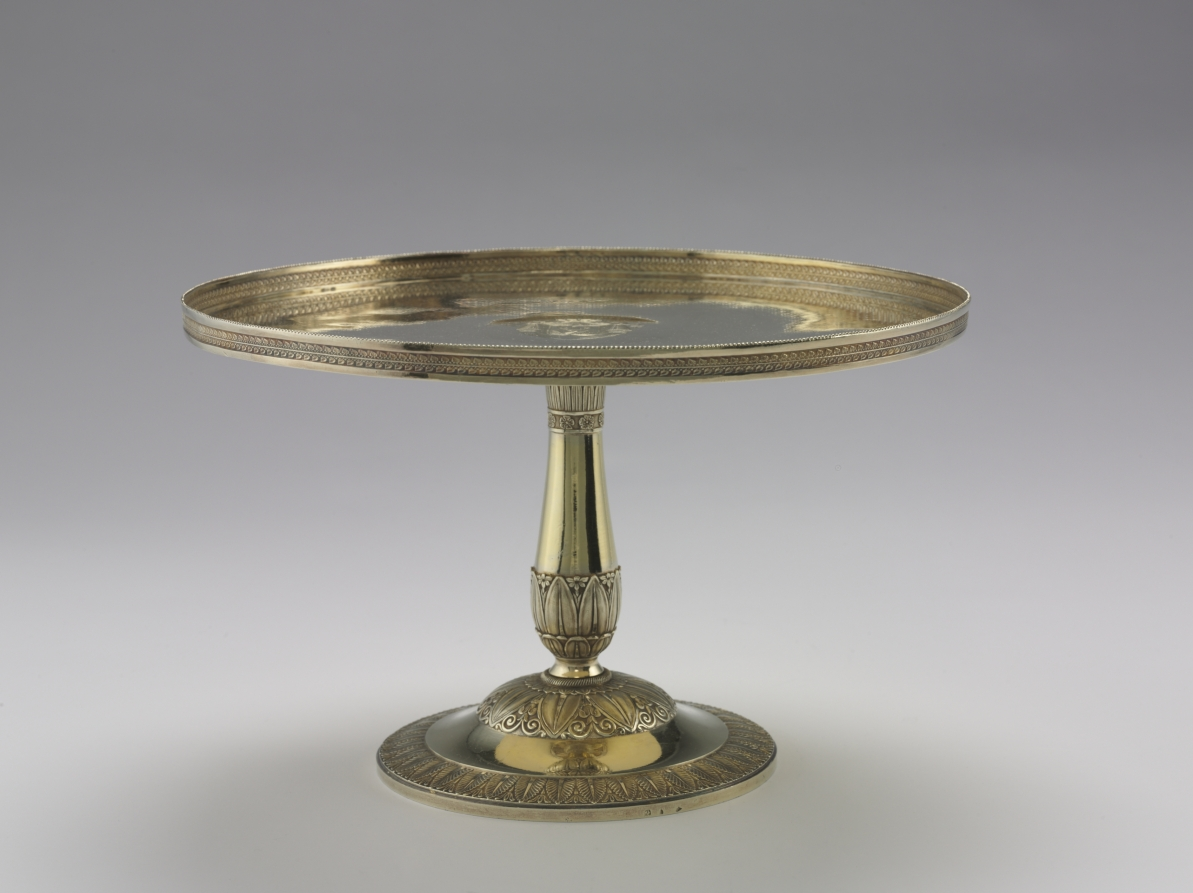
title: Tazza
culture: Italy, Rome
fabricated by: Pietro Paolo Spagna (Italian, 1793–1861)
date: c. 1815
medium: silver gilt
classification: Silver